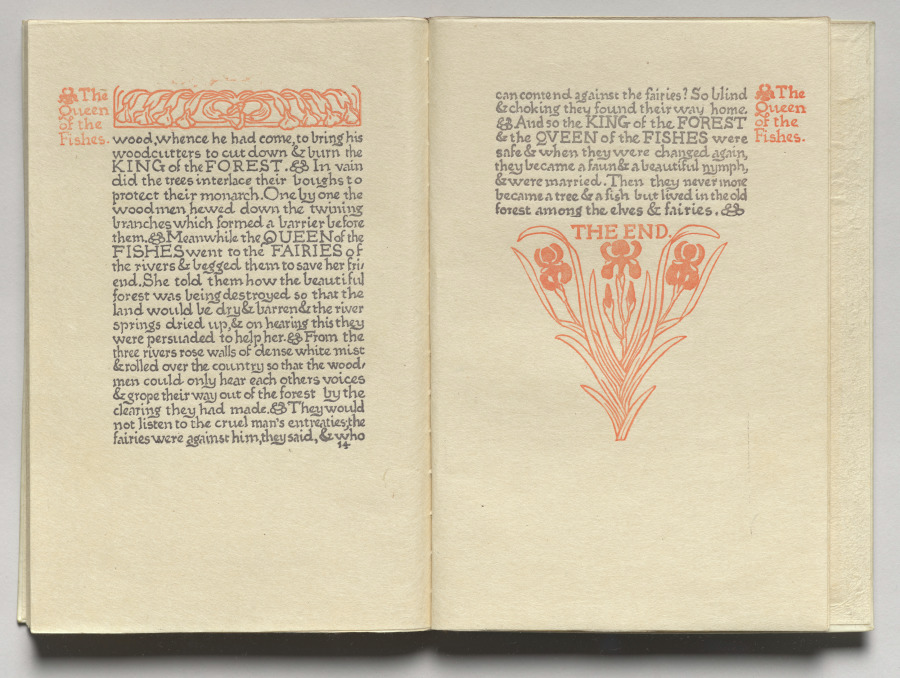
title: The Queen of the Fishes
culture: England, 19th century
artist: Lucien Pissarro (British, 1863–1944)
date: 1894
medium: Bound volume with color wood-engraved illustrations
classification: Bound Volume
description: “The Queen of the Fishes” is a French fairy tale about two mistreated children who turn into a fish and an oak tree. This edition was the first book published by the Eragny Press, the private firm of Lucien Pissarro, son of impressionist painter Camille Pissarro. Following the example of William Morris, Lucien wanted to return to the careful design and high-quality materials of early printed books. He and his wife, Esther Bensusan Pissarro, made this publication almost entirely by hand, including designing and engraving all the illustrations and ornaments.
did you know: Lucian Pissarro was a son of Impressionist painter Camille Pissarro.